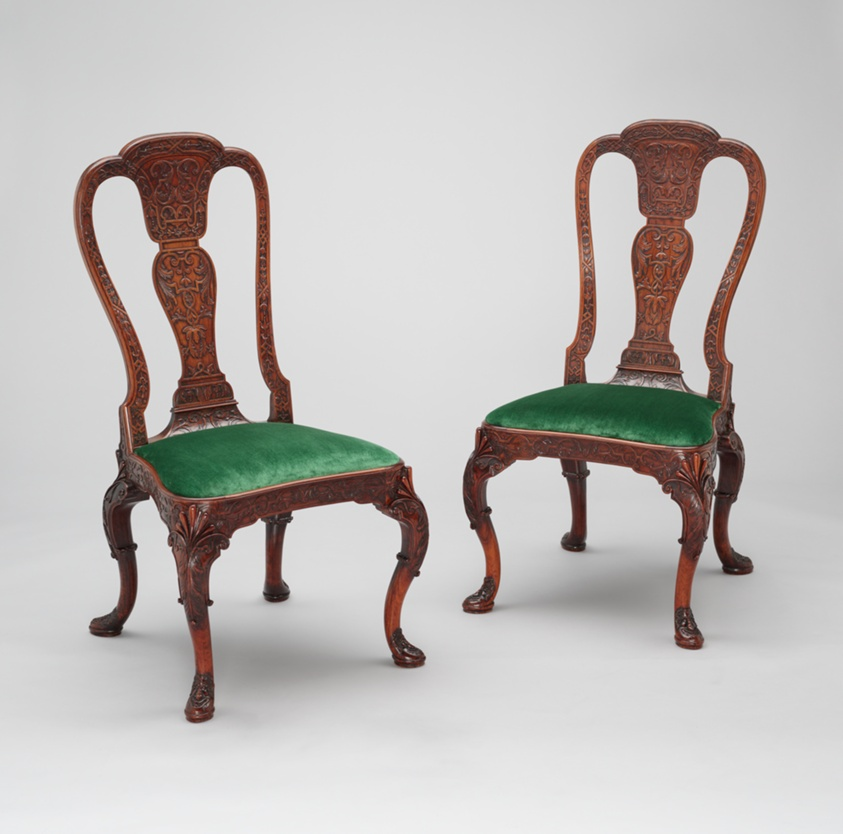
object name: Furniture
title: Chair (one of a pair)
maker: Chinese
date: c. 1730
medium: Padauk wood with textile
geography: China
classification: furniture; european decorative arts; chair